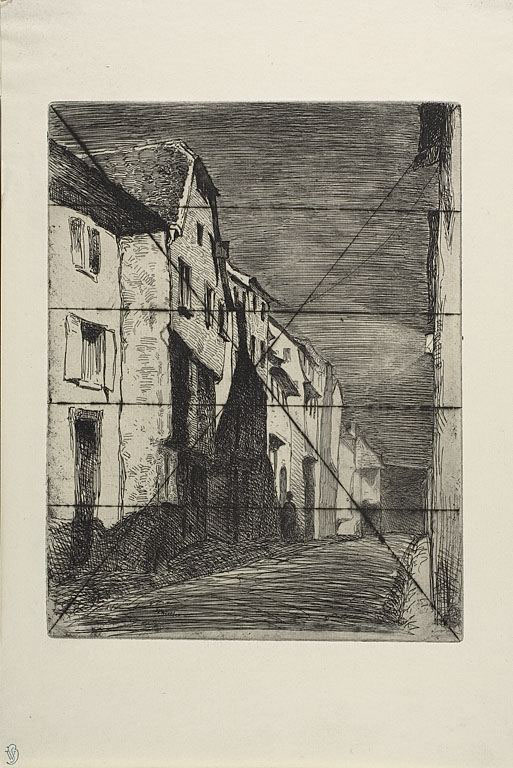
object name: Print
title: Street at Saverne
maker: James McNeill Whistler (American, 1834-1903)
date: 1858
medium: Etching with foul biting, with drypoint cancellation, in black ink on ivory laid paper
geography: United States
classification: etching; drypoint; foul biting; print; prints and drawing; paper